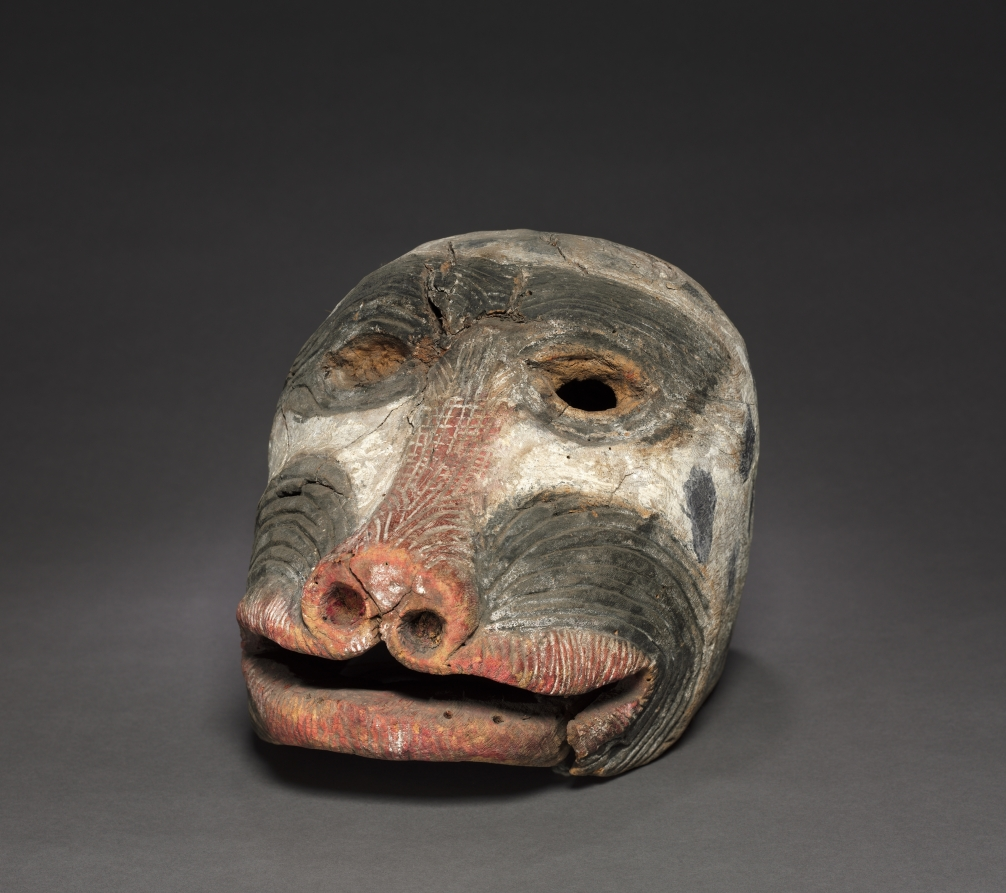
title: Mask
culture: Mexico, Paintla, 19th century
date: 1800s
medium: wood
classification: Sculpture